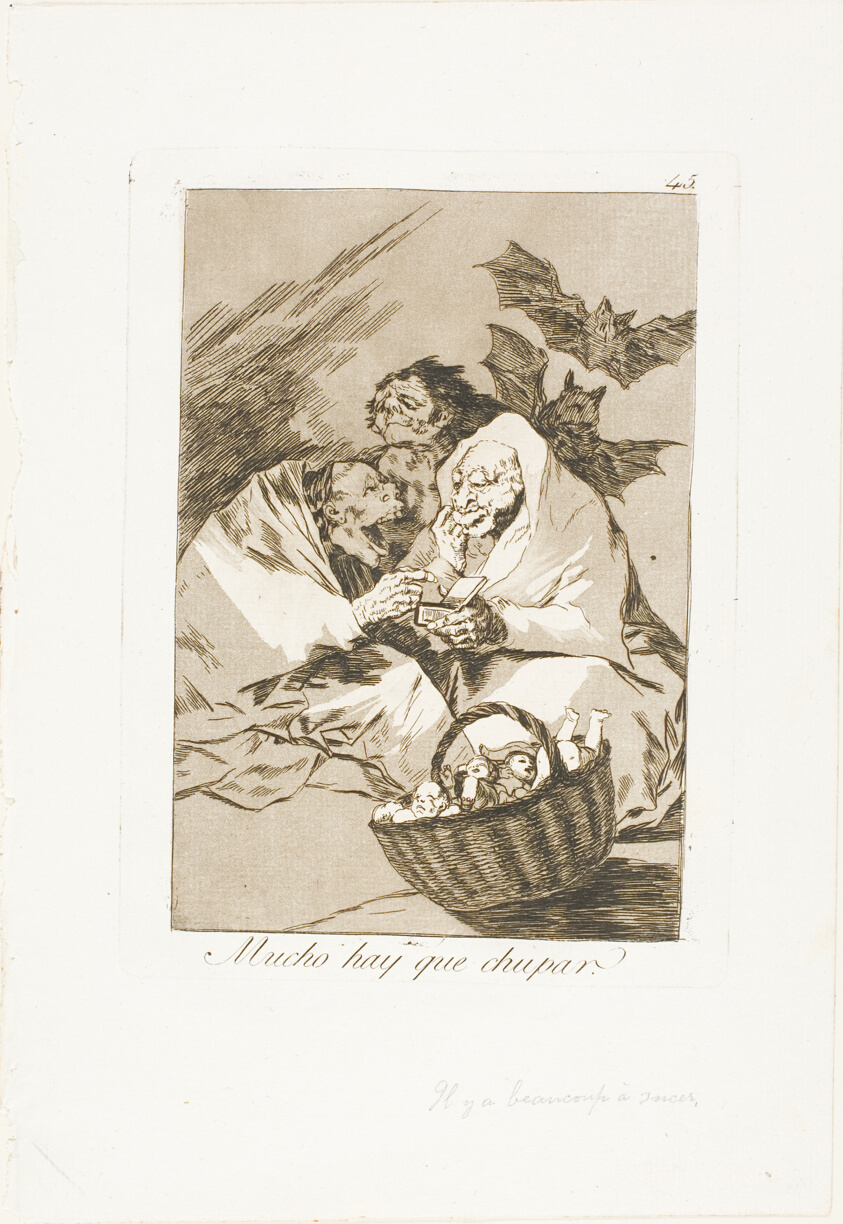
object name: Print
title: There is Plenty to Suck, plate 45 from Los Caprichos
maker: Francisco José de Goya y Lucientes (Spanish, 1746-1828)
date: 1797/99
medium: Etching and aquatint on ivory laid paper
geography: Spain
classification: etching; print; prints and drawing